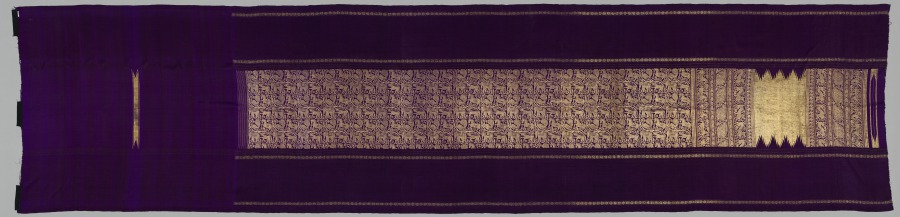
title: Sari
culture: India, Benares, 19th century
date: 1800s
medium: silk and gold brocade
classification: Textile